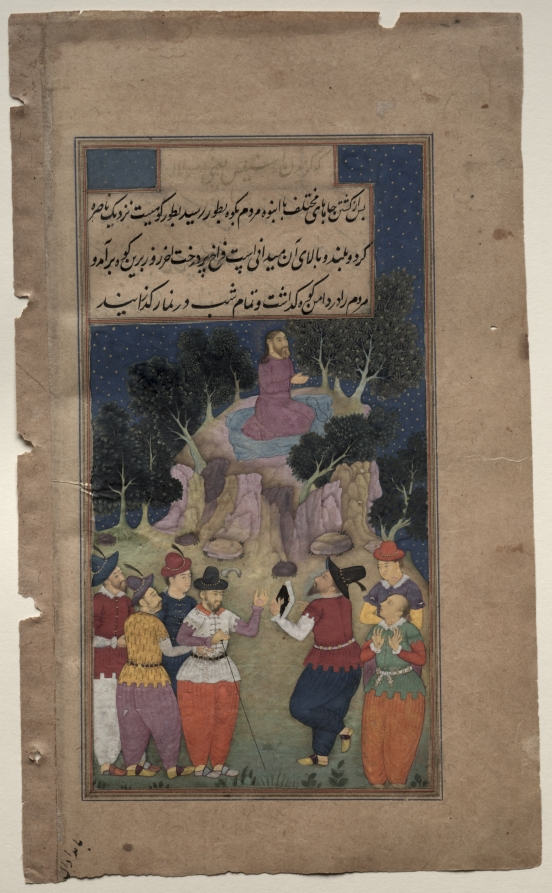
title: Jesus on Mount Tabor, near Nazareth where he Chooses Twelve of his Followers and Calls them Apostles (folio 87 verso), from a Mirror of Holiness (Mir’at al-quds) of Father Jerome Xavier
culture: Mughal India, Allahabad, made for Prince Salim (1569–1627)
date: 1602–04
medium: Gum tempera, ink, color, and gold on paper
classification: Manuscript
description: When Jesus arrived at Mount Tabor, he left his followers at the foot of the hill and spent the entire night in prayer. This is the only night scene in the manuscript, and the artist has used glowing colors and gold paint to dot the night sky with stars. Seven of the 12 apostles mill around the foreground; some converse with animated gestures, possibly debating the contents of a text. At dawn Jesus will have summoned the 12, named them his apostles and given them the power to drive out unclean spirits and heal the sick and infirm.